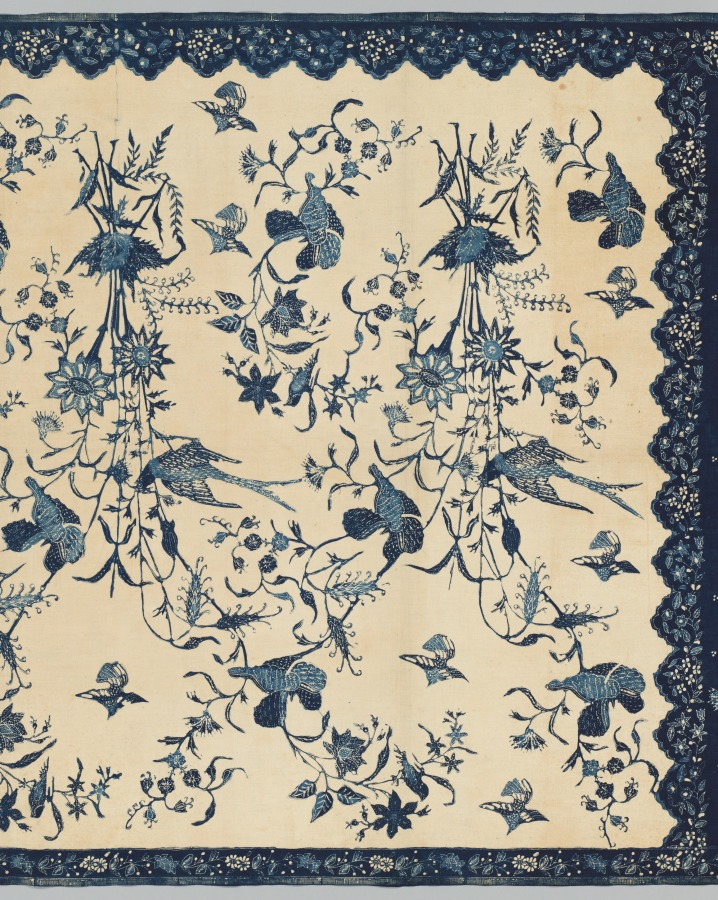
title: Sarong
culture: Indonesia, Java, North Coast, Indramaju ?, early 20th century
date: early 1900s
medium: batik; cotton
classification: Textile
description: Batiks made along the northern coast of Java were influenced not only by Chinese motifs and designs but also European, as a result of the Dutch presence in Indonesia from the sixteenth to the twentieth centuries. In this sarong, European influence is clearly evident in the sprays of flowers and types of birds represented. Batiks dyed only in indigo were a specialty of Indramaju. Shading and contrast are skillfully achieved through different intensities of blue, through the character and thickness of line, and by the use of tiny dots.